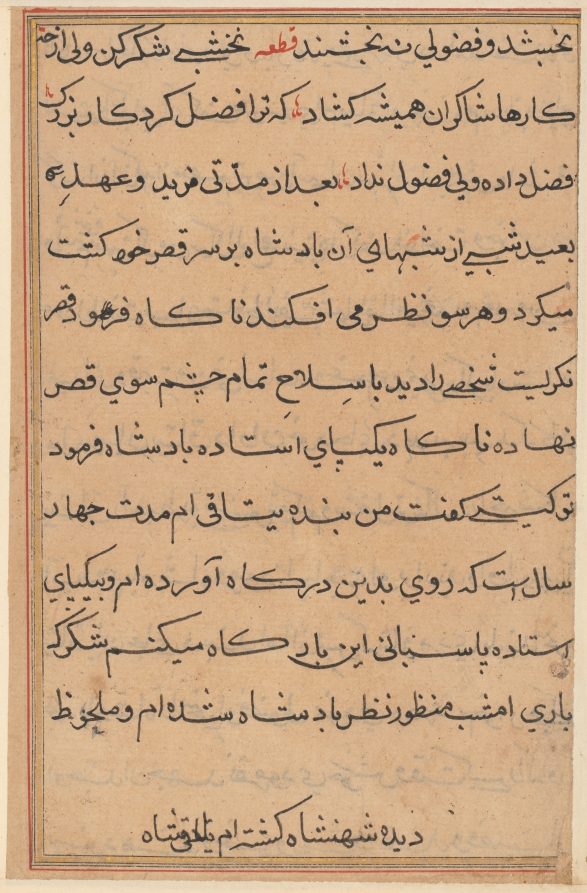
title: Page from Tales of a Parrot (Tuti-nama): text page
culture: Mughal India, court of Akbar (reigned 1556–1605)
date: c. 1560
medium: gum tempera, ink, and gold on paper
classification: Painting